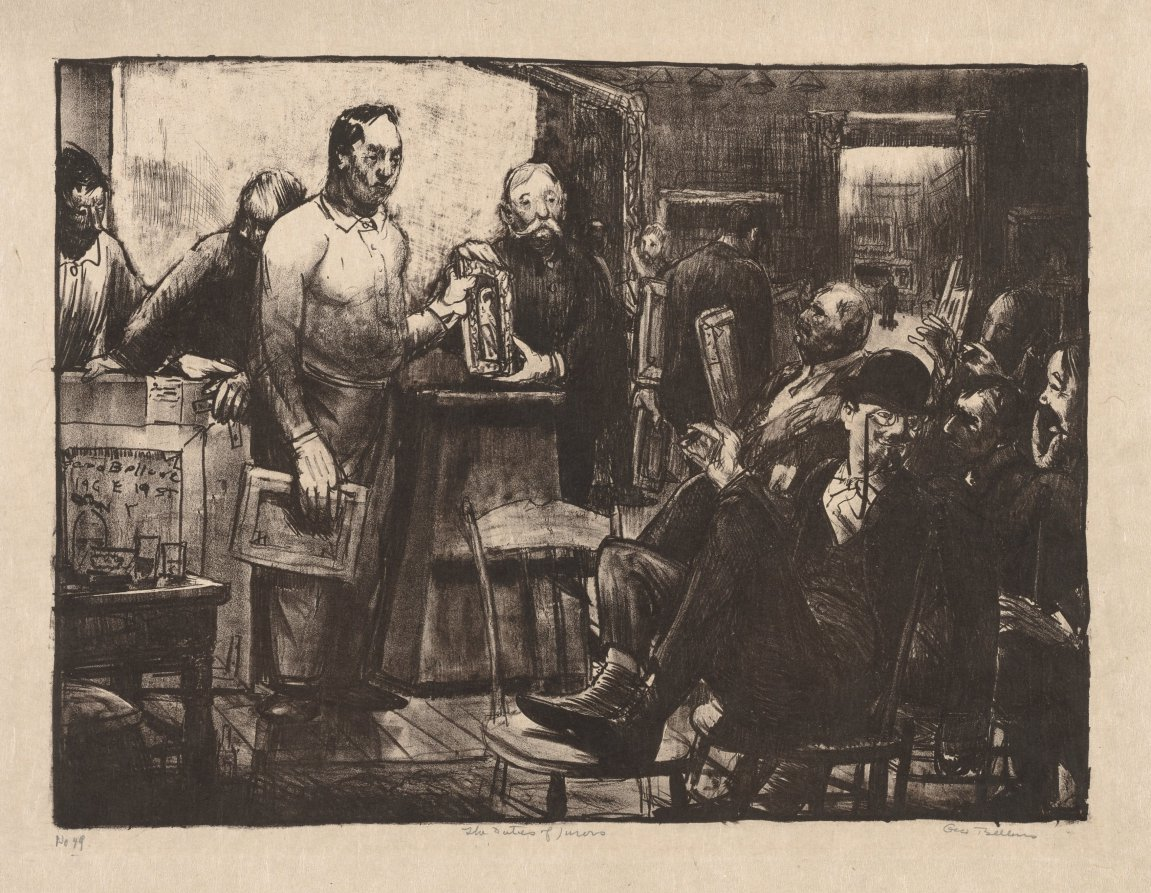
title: The Jury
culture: America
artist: George Bellows (American, 1882–1925)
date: 1916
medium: lithograph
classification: Print